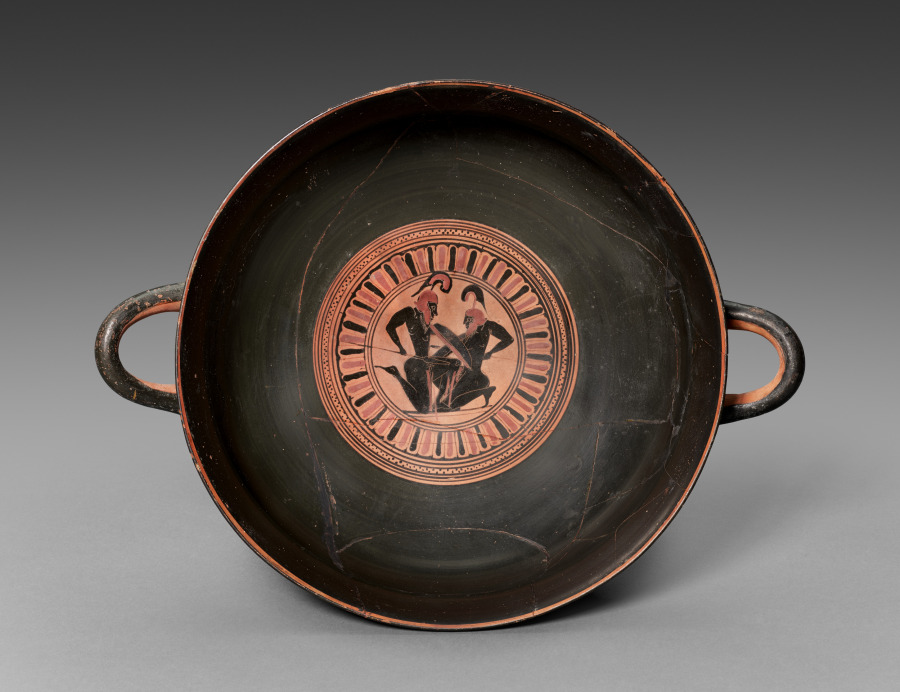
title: Siana Cup (Black-Figure Kylix [Drinking Cup]): Horseman and Warriors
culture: Greek, Attic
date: 575–550 BCE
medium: ceramic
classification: Ceramic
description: Two kneeling warriors do battle in the tondo of this large drinking cup, red blood streaming from their wounded legs. Without labels or attributes, their identities remain uncertain—perhaps Eteokles and Polyneikes, the cursed sons of Oedipus. The exterior figures are anonymous, although many are accompanied by small dots probably meant to imitate letters (for identifying inscriptions). On one side, a warrior is greeted by a nude youth holding a garland, with a horseman, a flying eagle, and several men observing. On the other, a bearded man rides a rearing horse, flanked by six draped men. Waterbirds stand beneath the handles.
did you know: Siana cups take their name from a cemetery in Rhodes where many were first found.